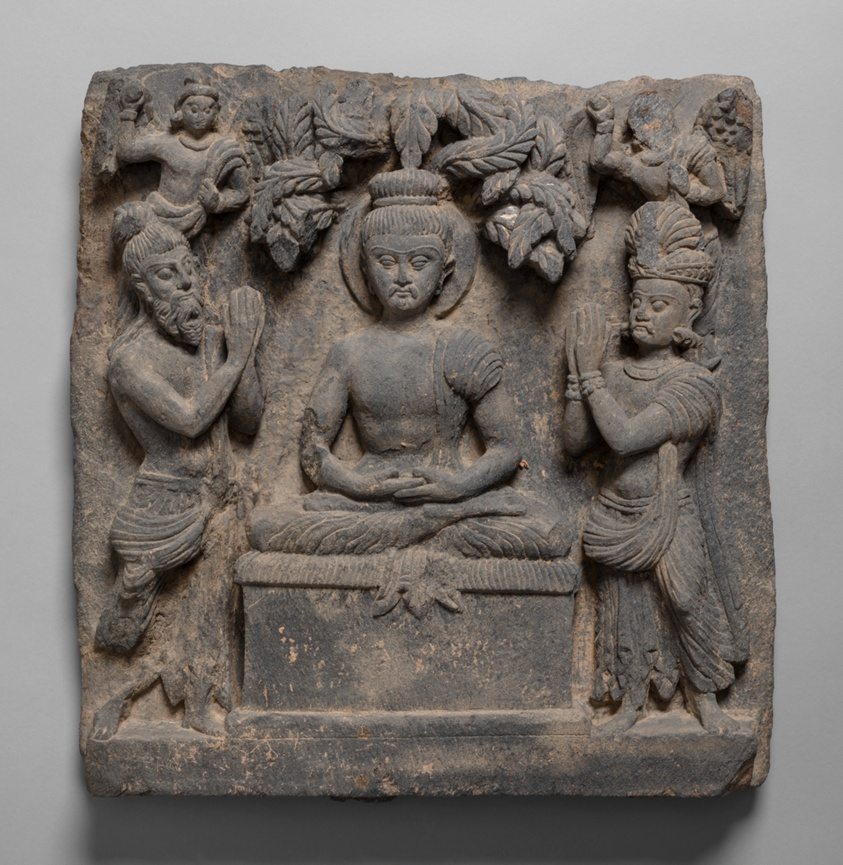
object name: Sculpture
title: Buddha Worshipped by the Gods Indra and Brahma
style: South Asian, gandharan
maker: Pakistan; Ancient region of Gandhara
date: Kushan period, 1st/2nd century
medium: Schist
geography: Gandhara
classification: sculpture; stone (unidentified); stone; asian art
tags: Buddha